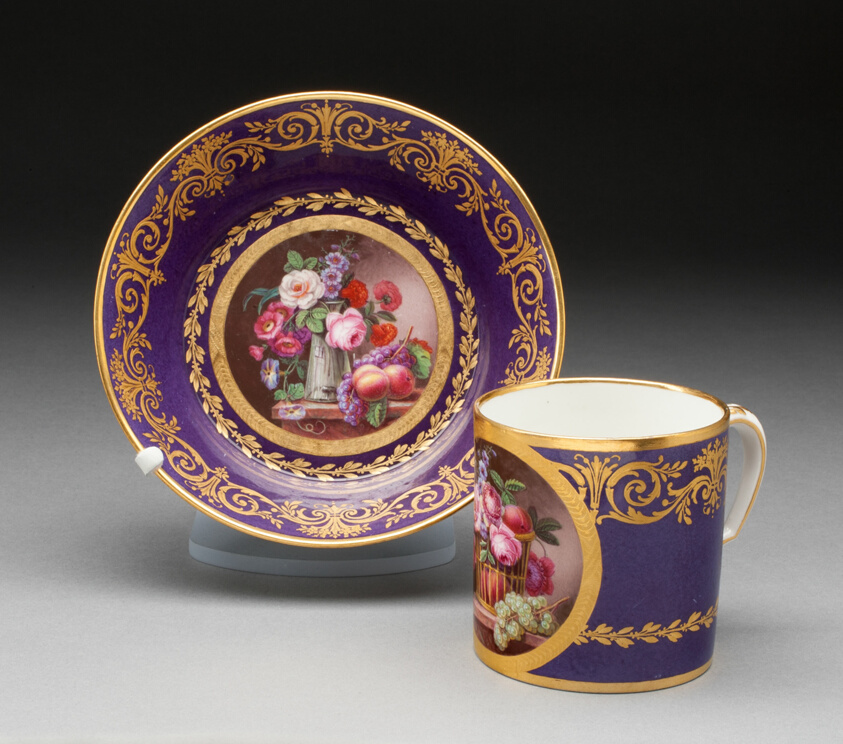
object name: Ceramics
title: Cup and Saucer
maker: Sèvres Porcelain Manufactory; French, founded 1740; Painted by Etienne Leguay (French, 1762-1846)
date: 1792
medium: Soft-paste porcelain with polychrome enamels and gilding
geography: Sèvres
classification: drinking vessel; teaware; porcelain; european decorative arts; ceramics